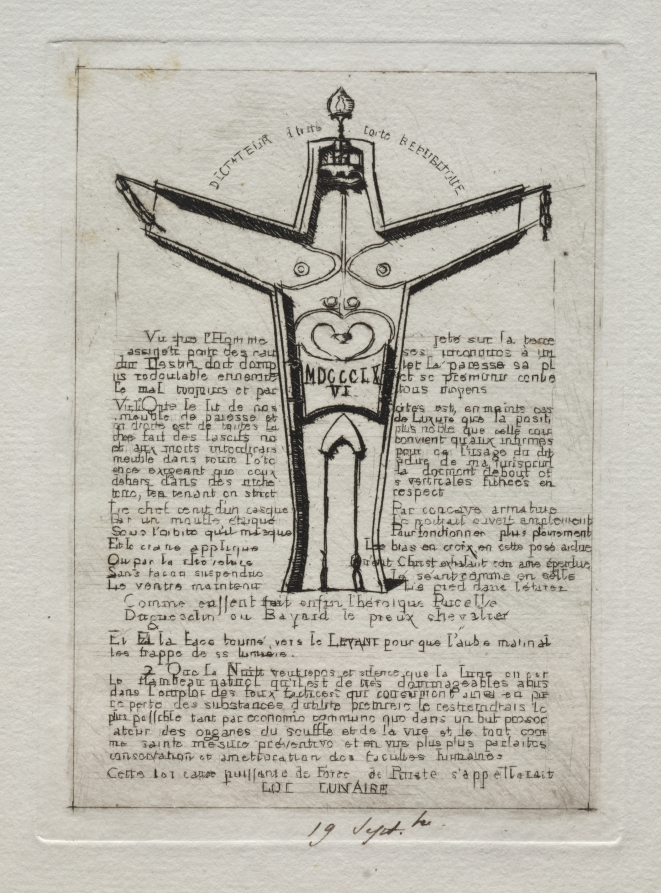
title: Lunar Law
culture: France, 19th century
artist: Charles Meryon (French, 1821–1868)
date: 1866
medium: etching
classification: Print